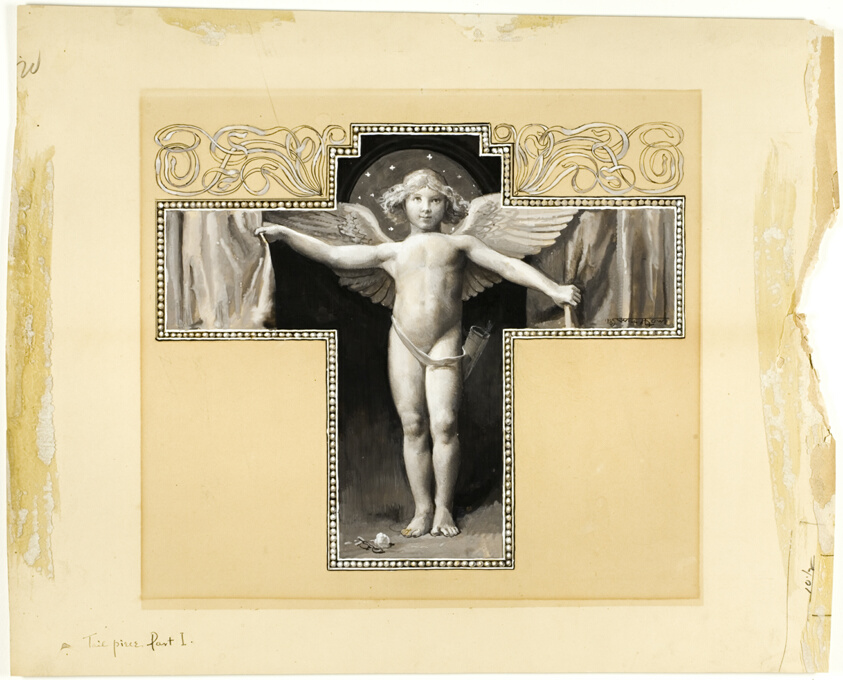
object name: Drawing and Watercolor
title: Shut from the Busy World of More Incredulous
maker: Will Hicock Low (American, 1853-1932)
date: 1885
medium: Black and gray gouache, heightened with white gouache, over traces of graphite, on cream wove card (discolored to tan)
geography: United States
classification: drawings (visual works); prints and drawing